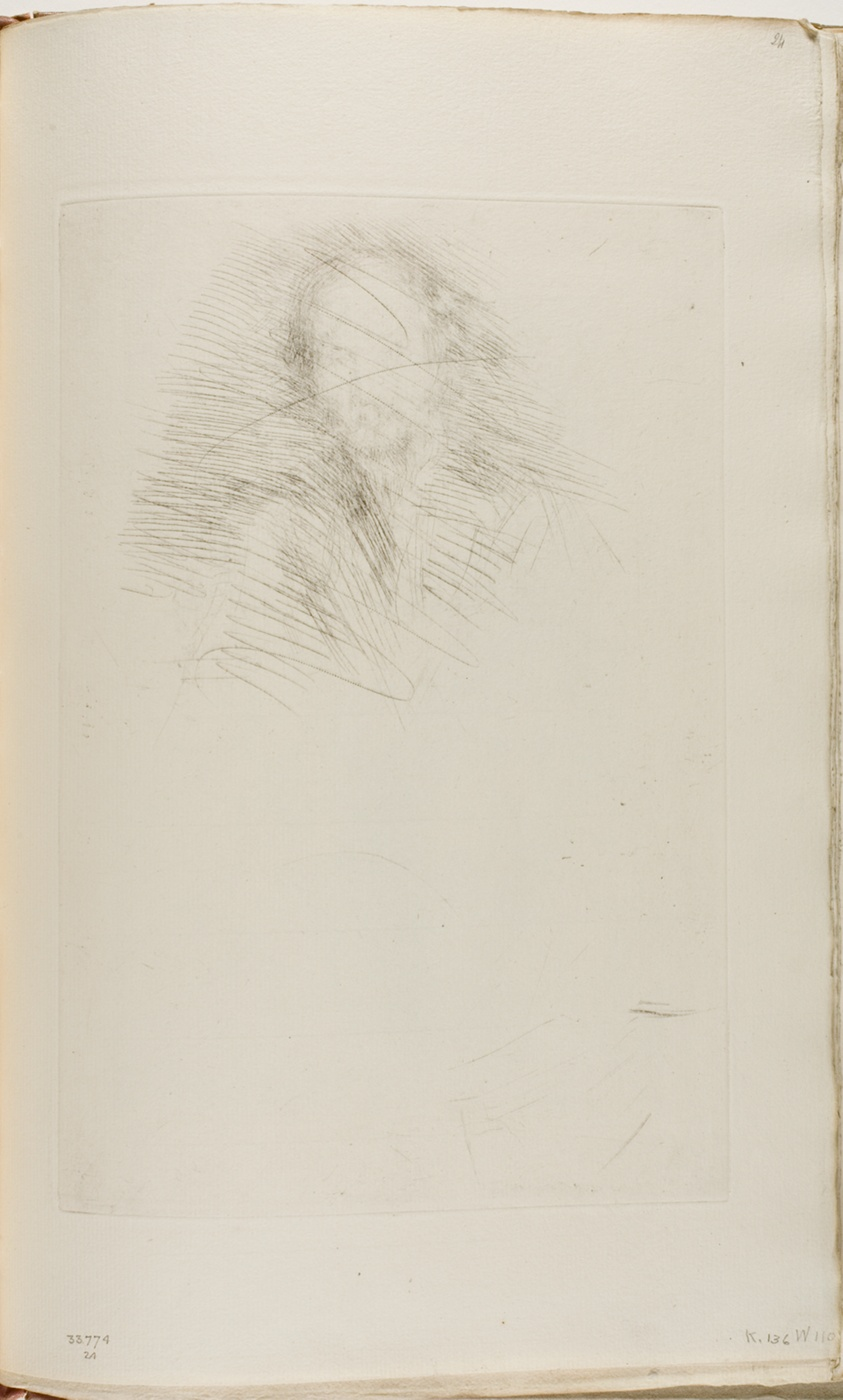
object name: Print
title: Swinburne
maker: James McNeill Whistler (American, 1834-1903)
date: 1873/77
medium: Drypoint, with drypoint cancellation, in black ink on ivory laid paper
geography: United States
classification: drypoint; prints and drawing; book; print; paper